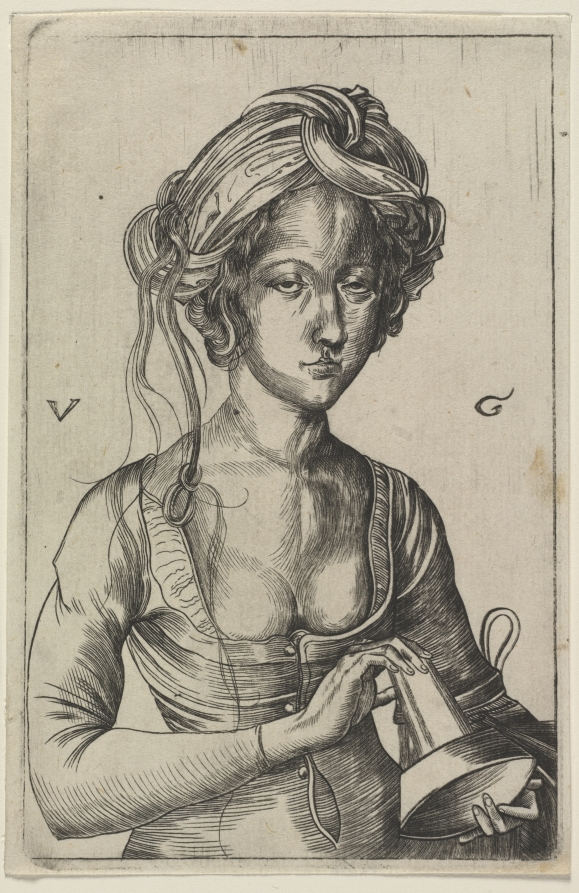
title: One of the Foolish Virgins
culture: Switzerland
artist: Urs Graf the Elder (Swiss, c. 1485–1527/29)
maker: after Martin Schongauer (German, c. 1450–1491)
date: 1500–20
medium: engraving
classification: Print